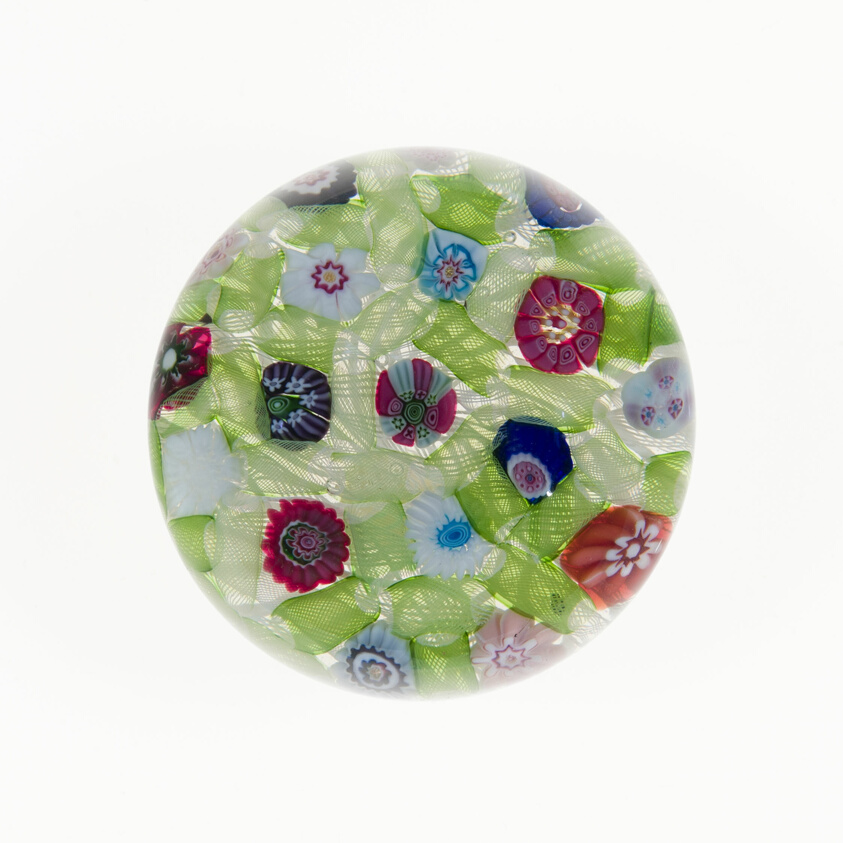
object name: Glass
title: Paperweight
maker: Clichy Glassworks (Cristalleries de Clichy); Clichy, France, 1837-1885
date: 19th century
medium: Glass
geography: Clichy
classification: paperweight; millefiori; european decorative arts; glass